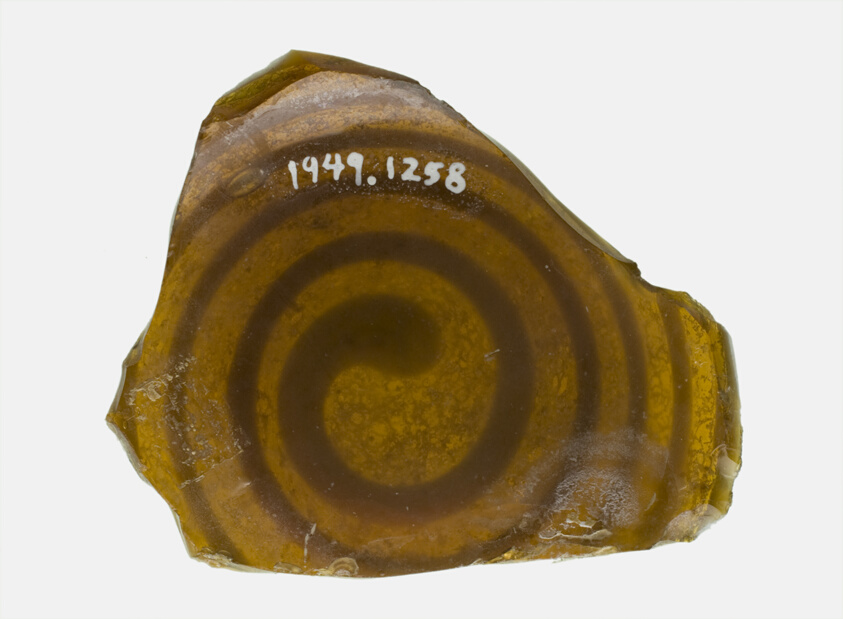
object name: Decorative Arts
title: Fragment of a Bowl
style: ancient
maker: Roman or Eastern Mediteranean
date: 1st century BCE–1st century CE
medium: Glass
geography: Eastern Mediterranean Region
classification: fragment; decorative arts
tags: decoration